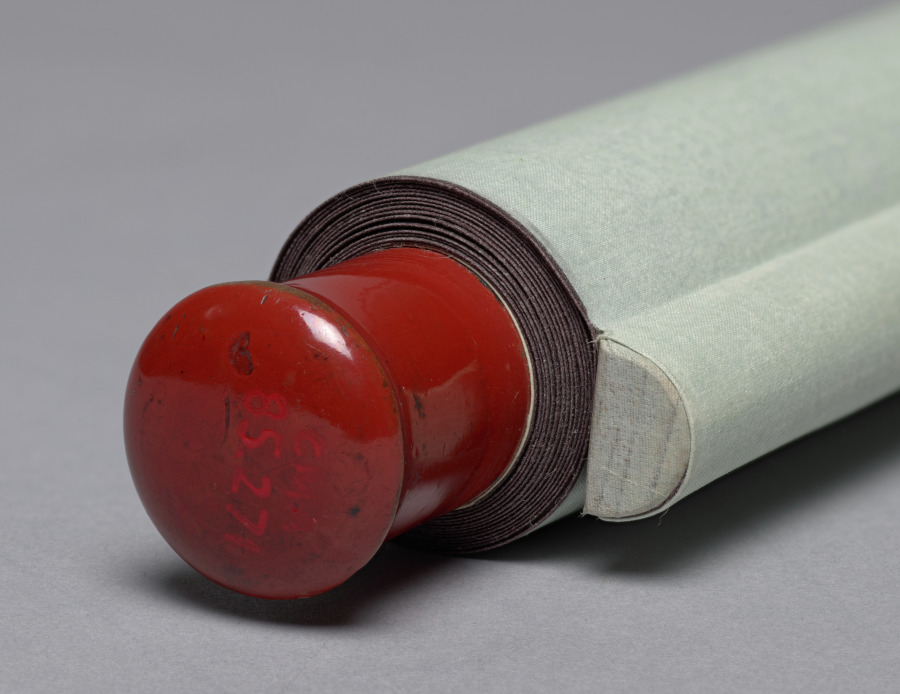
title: A Beauty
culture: Japan, Edo period (1615–1868)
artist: Gion Seitoku (Japanese, active late 1700s–early 1800s)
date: early 1800s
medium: hanging scroll; ink and color on paper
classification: Painting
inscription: 東山画奴井特寫 「字日伯立」白文方印・「せいとく」朱文千鳥印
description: A Kyoto-based ukiyo-e painter, Gion Seitoku specialized in portraying women from Gion and Shimabara, licensed brothel districts in that city. He was known for detailing faces with subtle modeling to heighten a sense of realism. During the 1700s and 1800s, wearing iridescent, greenish lip gloss made from safflower was in vogue. In addition, Japanese women almost universally practiced the custom of artificially blackening their teeth with a stain.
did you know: The person's lipstick is made from safflower.